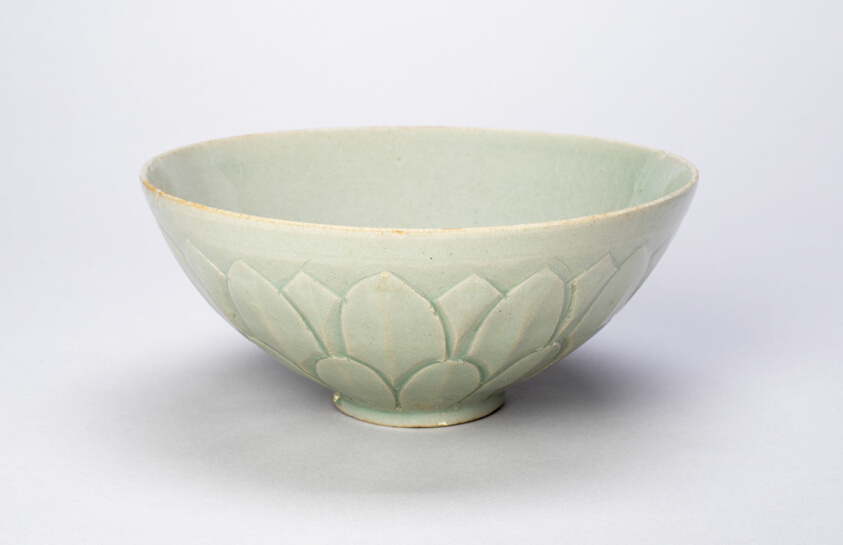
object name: Vessel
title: Bowl with Layered Lotus Petals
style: Korean (culture or style)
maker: Korea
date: Goryeo dynasty (918–1392), 12th century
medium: Stoneware with celadon glaze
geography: South Korea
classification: bowl; dish (vessel); vessel